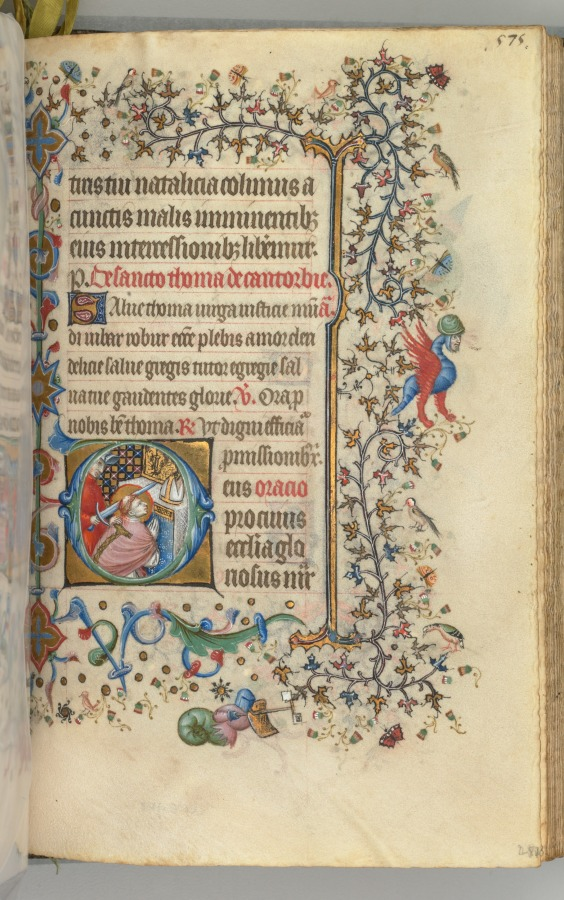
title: Hours of Charles the Noble, King of Navarre (1361-1425): fol. 282r, St. Thomas à Becket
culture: France, Paris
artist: Master of the Brussels Initials and Associates (French)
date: c. 1405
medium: ink, tempera, and gold on vellum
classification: Bound Volume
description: This precious volume was obviously highly prized by its owner, the French-born King of Navarre, who had his coat of arms painted on no less than twenty folios. Rather than directly commissioning this manuscript from a specific workshop, it seems that Charles the Noble acquired his book of hours -- perhaps ready-made for the luxury market -- while on a trip to Paris in 1404-05. A collaborative effort, six painting styles are evidenced within the pages of this codex, those of two Italians, two Frenchmen, and two Netherlanders. The painter who was responsible for the planning and decoration of the book, and who produced seventeen of the large miniatures, was a Bolognese artist known as the Master of the Brussels Initials. His principal assistant, responsible for most of the borders, was a Florentine who signed his name "Zecho" da Firenze on folio 208 verso.